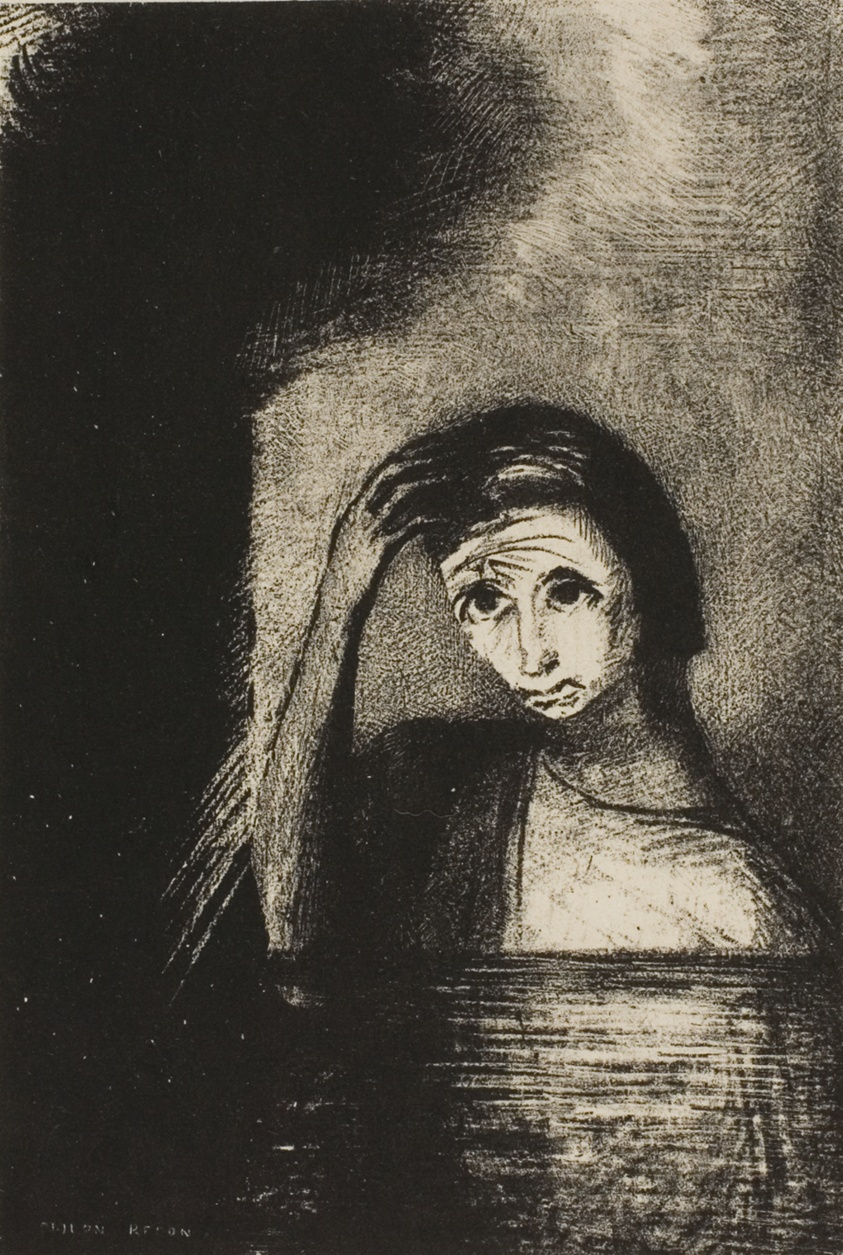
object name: Print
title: Frontispiece from Emile Verhaeren's Les Debacles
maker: Odilon Redon (French, 1840-1916)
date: 1889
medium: Lithograph in black on cream wove paper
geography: France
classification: lithograph; print; prints and drawing; paper